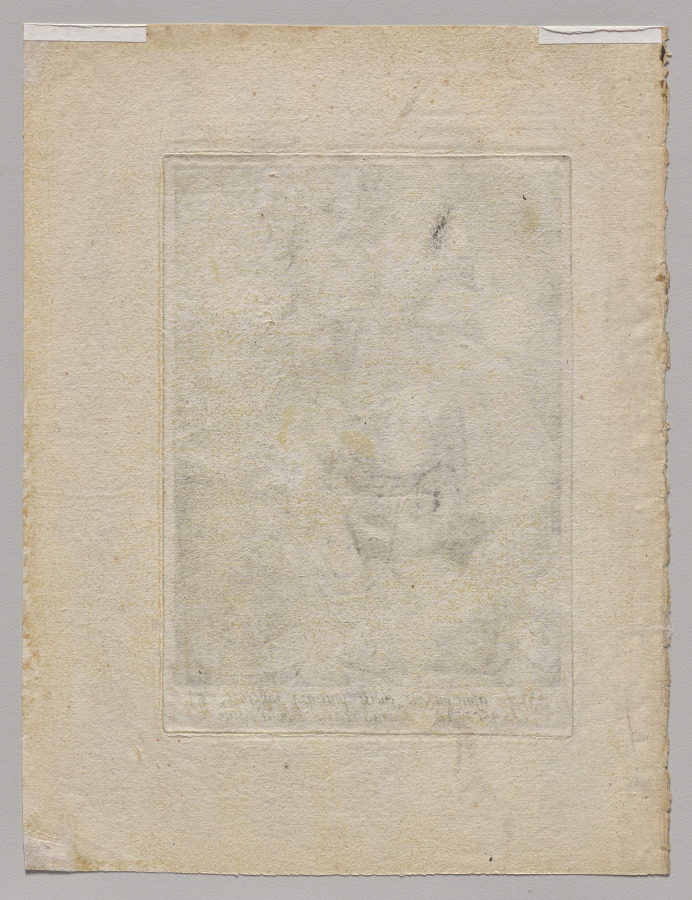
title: Plate 6: Isaachar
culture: Netherlands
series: The Twelve Sons of Jacob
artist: Jacob de Gheyn II (Netherlandish, 1565–1629)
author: after Karel I van Mander (Netherlandish, 1548–1606)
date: c. 1589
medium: engraving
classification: Print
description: In this print, the biblical figure Isaachar holds a rucksack while accompanied by a donkey, denoting his destiny to serve and perform hard labor. This is one of a series of prints depicting the twelve sons of Jacob, each with an attribute and costume that denotes his character. According to the Old Testament, Jacob blessed each of his twelve sons, prophesizing the destiny of their tribe, and assigning them a parcel of land in Canaan. The print series was made in the Netherlands in the late 16th century, a time of political struggle when Old Testament heroes were popular exemplars of fortitude and patience.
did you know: The rucksack carried by this Old Testament figure suggests his perpetual travel while the donkey denotes his employment as a laborer.